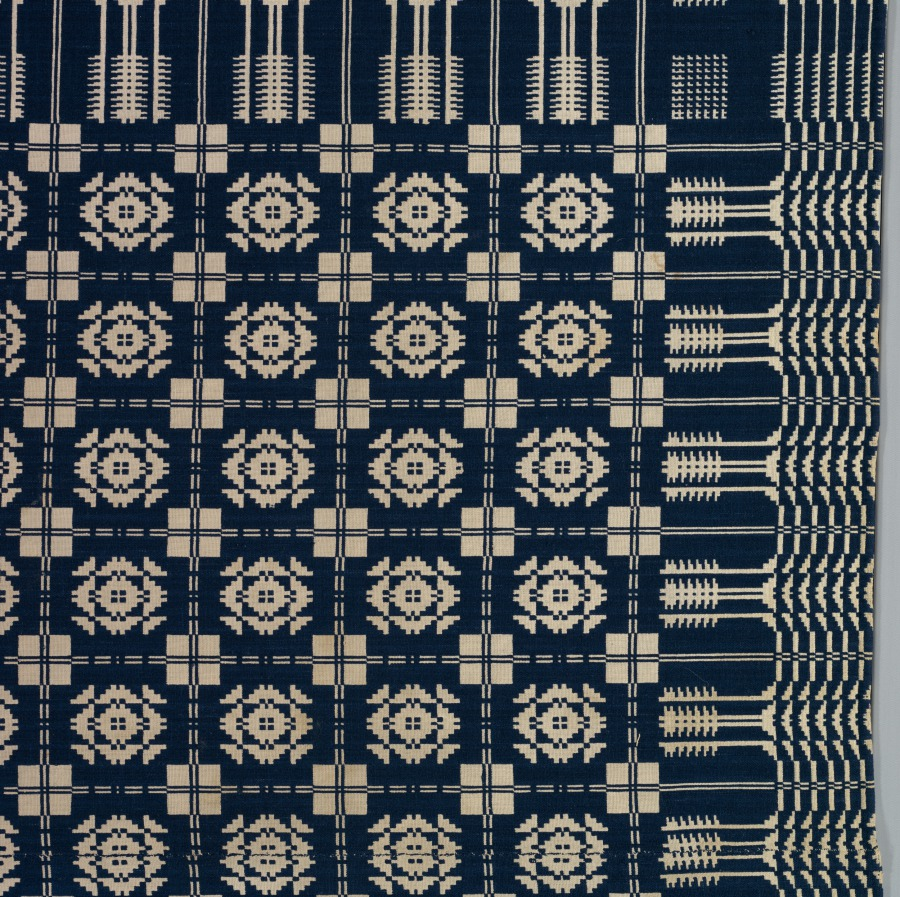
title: Coverlet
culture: America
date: 1825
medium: double weave: wool and cotton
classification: Textile